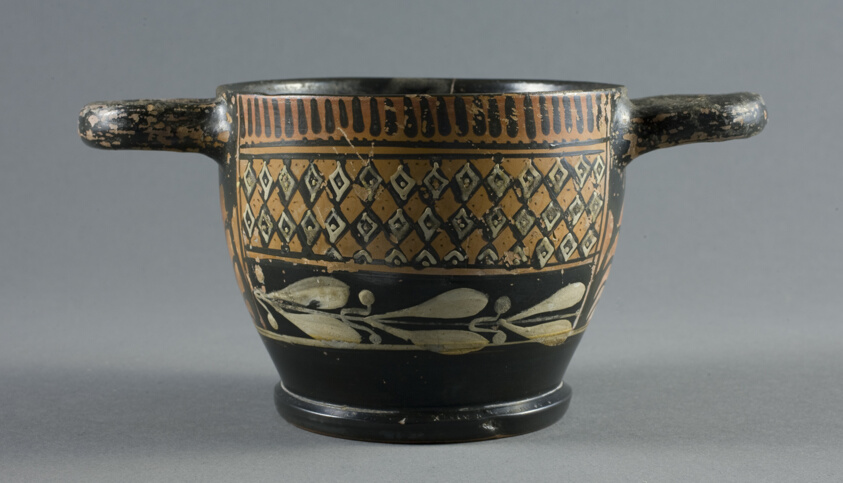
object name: Vessel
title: Skyphos (Drinking Cup)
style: attic, ancient, greek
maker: Greek; Athens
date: 450-400 BCE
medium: terracotta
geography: Athens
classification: drinking vessel; ceramics; vessel; ancient art